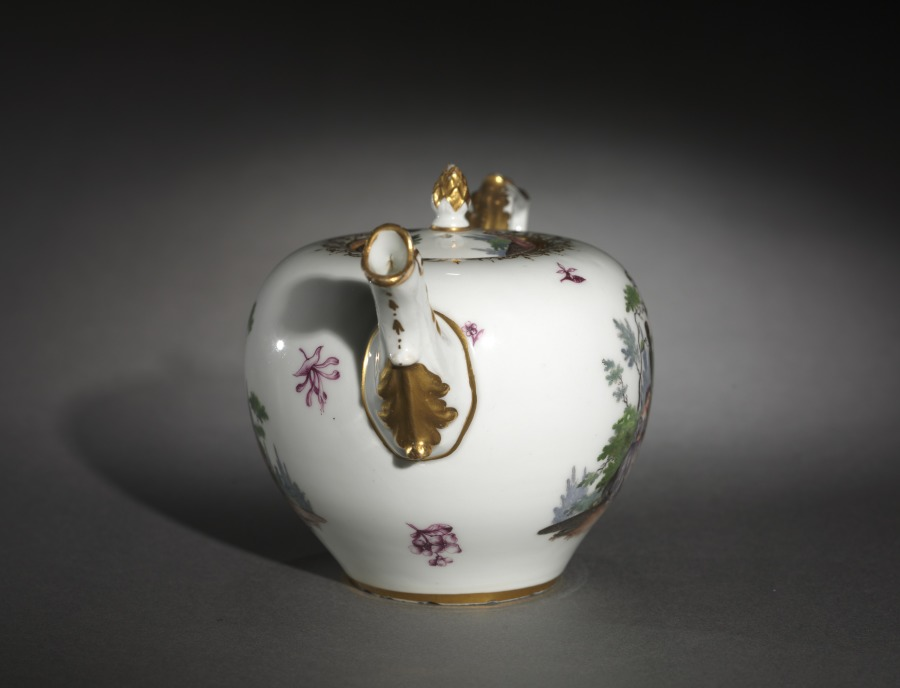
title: Teapot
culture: Germany, Meissen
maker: Meissen Porcelain Factory (German, est. c. 1710)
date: c. 1750–70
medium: porcelain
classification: Ceramic